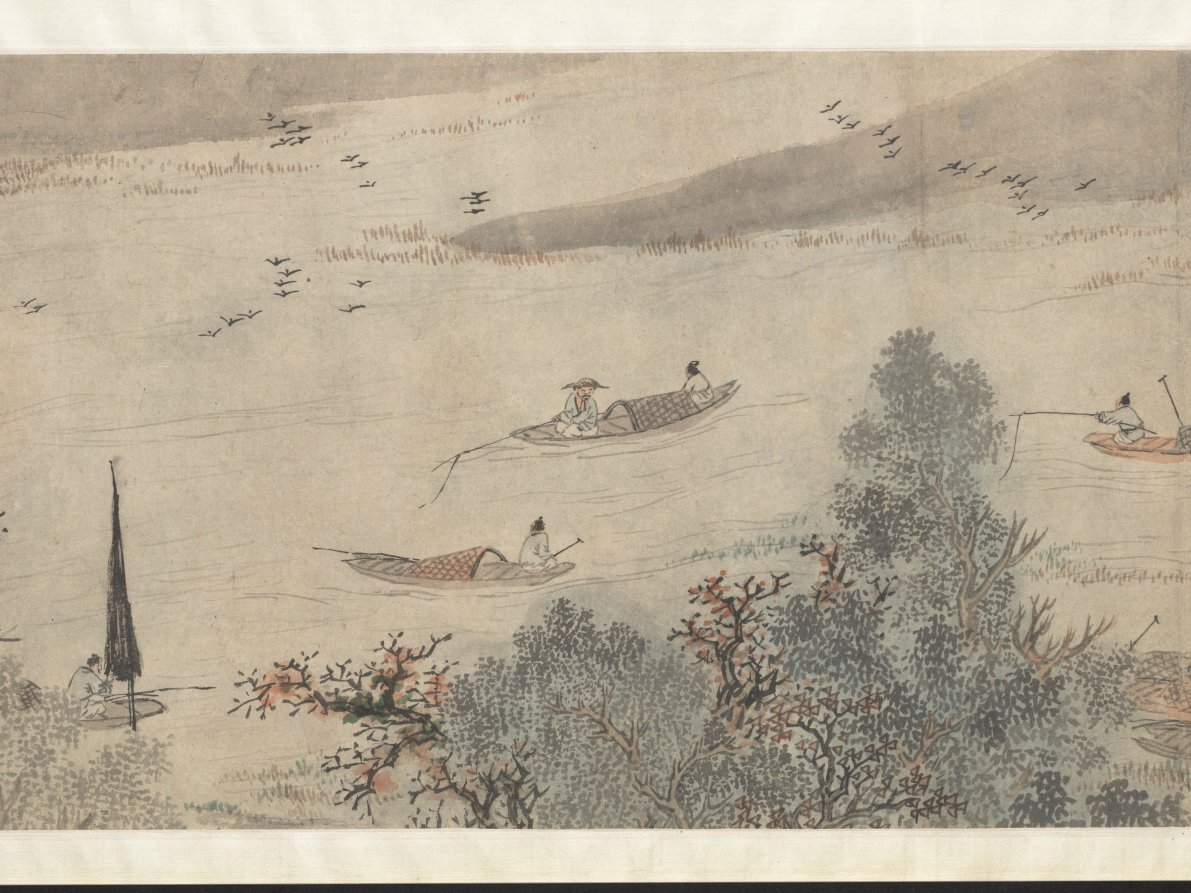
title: Fisherman's Joy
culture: China, Ming dynasty (1368–1644)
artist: Qian Gu (Chinese, 1508–c. 1578)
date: 1572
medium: Handscroll; ink and light color on paper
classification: Painting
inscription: Artist's inscription, signature, and seal: On the autumn day of the jen-shen year [1572], P'eng-ch'eng, Ch'ien Ku painted [this]. [seal] Hsüan-ch'ing shih. 2 colophons, both dated 1689, and 5 additional seals of Yün Shou-p'ing (1633-1690).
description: This painting has a scene showing two small crafts, each manned by two fishermen, practicing a traditional fishing method. In one of them, a man uses a bamboo pole to direct the movements of a cormorant bird sent into the water. Cormorant fishing, witnessed in some areas of the lower Yangzi River, appears in Zhe school paintings. Qian Gu may have borrowed these narrative figure scenes from Zhe school paintings, while his vantage point, brushwork, and soft tones align with the Wu school style. Scenes of fishermen appealed to urban and educated audiences who idealized the self-sufficient independence of fisherfolk.